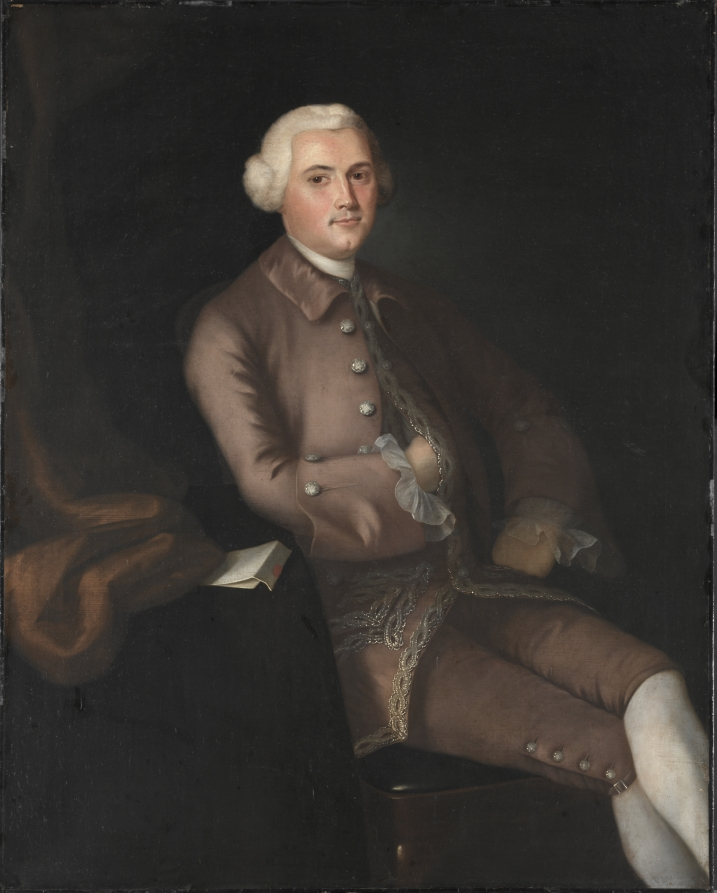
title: John Browne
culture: America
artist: Joseph Blackburn (British, c. 1730–1787)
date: c. 1760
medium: oil on canvas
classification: Painting